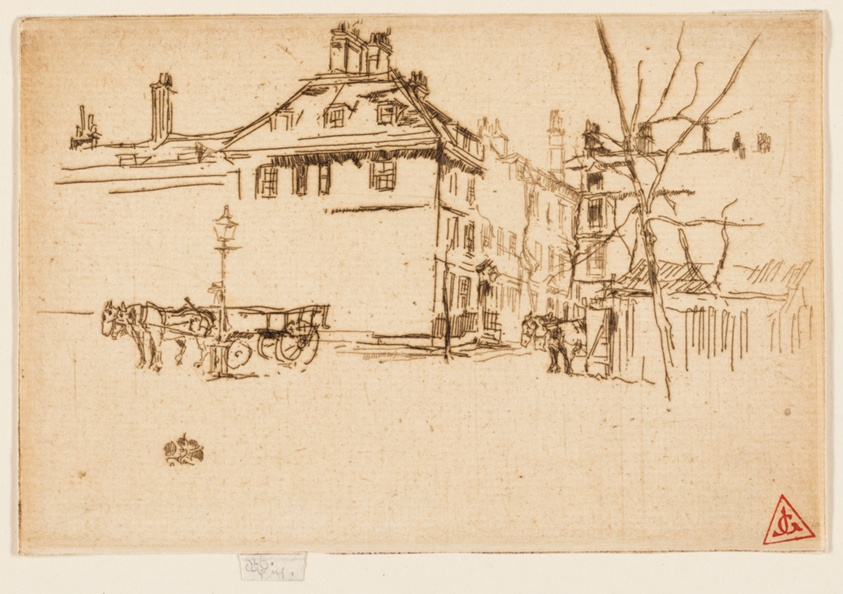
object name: Print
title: The Temple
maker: James McNeill Whistler (American, 1834-1903)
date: 1880/81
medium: Etching in brown ink on ivory laid paper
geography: United States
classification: etching; print; prints and drawing; paper